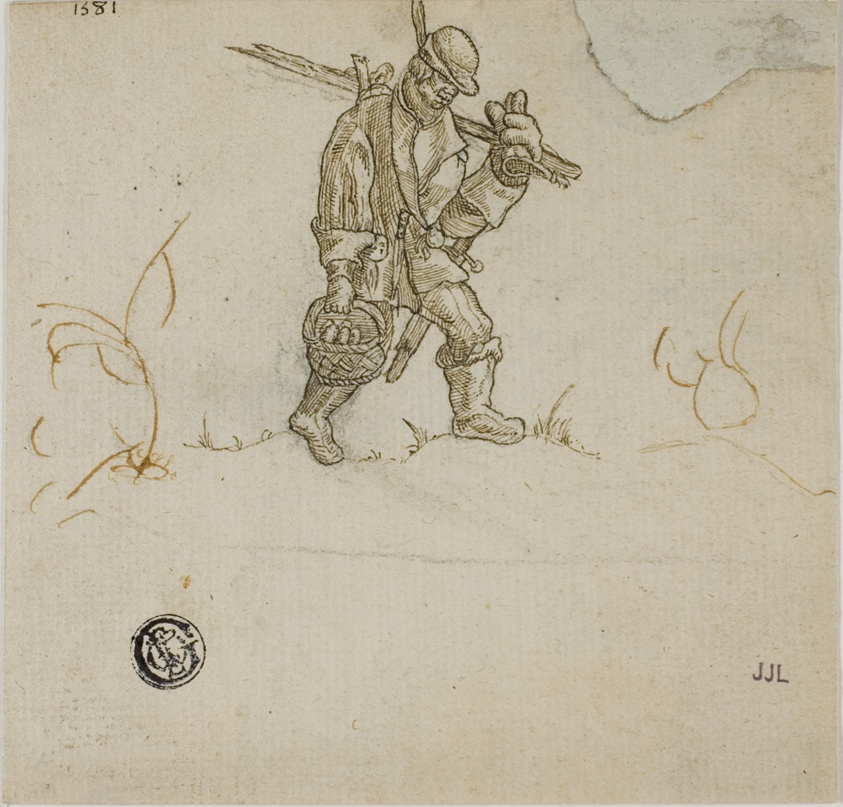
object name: Drawing and Watercolor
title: Peasant Carrying Bucket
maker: After Sebald Beham; German, 1500-1550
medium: Pen and brown ink, over graphite, on cream laid paper, laid down on ivory laid paper with blue fibers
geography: Germany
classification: pen and ink drawings; drawings (visual works); prints and drawing